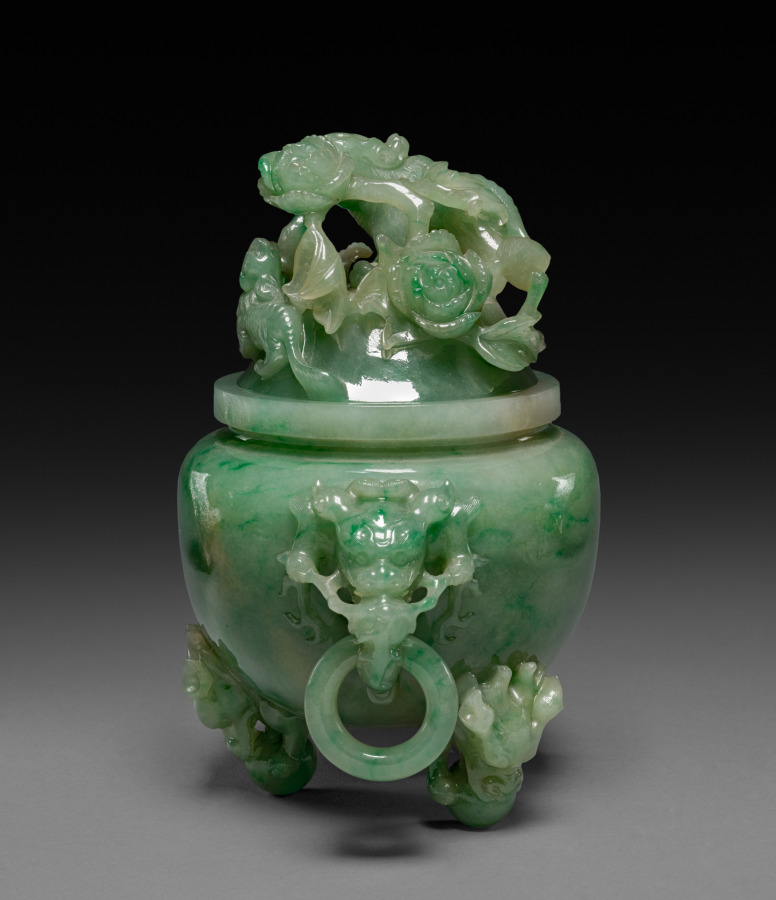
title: Tripod Vase: Ting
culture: China, Qing dynasty (1644-1911)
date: 1644–1911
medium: jade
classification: Jade